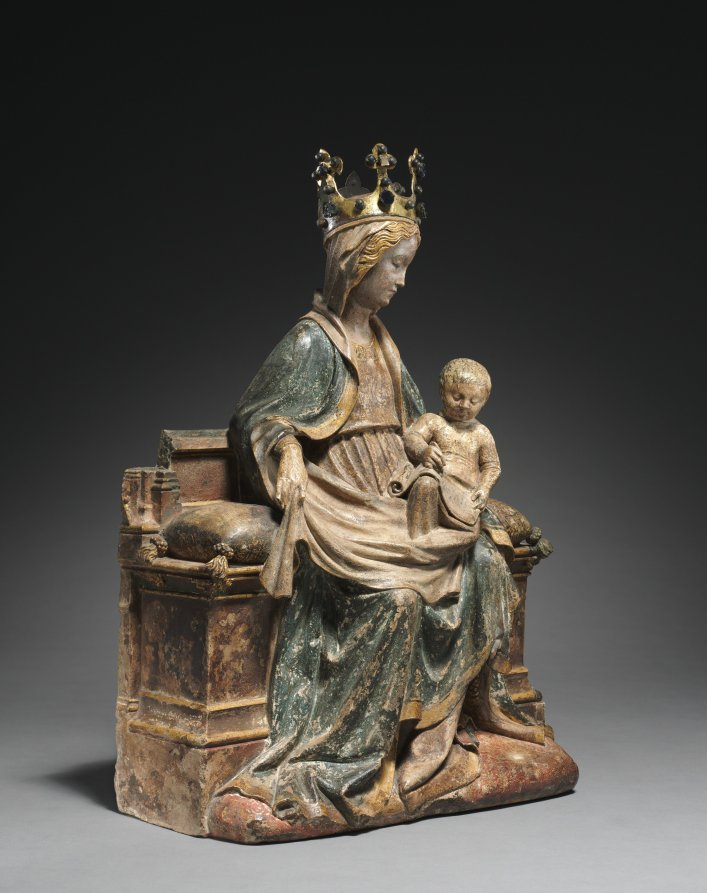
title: Enthroned Virgin with the Writing Christ Child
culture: Franco-Netherlandish, active Paris(?), 15th century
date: c. 1400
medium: limestone with polychromy and gilding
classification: Sculpture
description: This sculpture belongs to a tradition of seated Virgins that were prominent in Netherlandish art in the decades around 1400, and by extension may be associated with the Valois courts at Paris, Dijon, and Bourges. The theme of the Christ child who writes into an open book or onto a vellum banderole emerged during the third quarter of the 14th century and had great appeal among ecclesiastical and aristocratic clients. It undoubtedly refers to the educating and nurturing role of the mother in teaching the child, but also to the future position of the adult Christ as author and teacher. The small scale of this sculpture and the fact that its back is uncarved suggest that it was made for a small alcove or niche, appropriate in the intimate setting of a small chapel or oratory. The sculpture would have primarily been viewed from the front and perhaps from slightly below.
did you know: Here the Virgin is sitting on a highly decorated pillow.